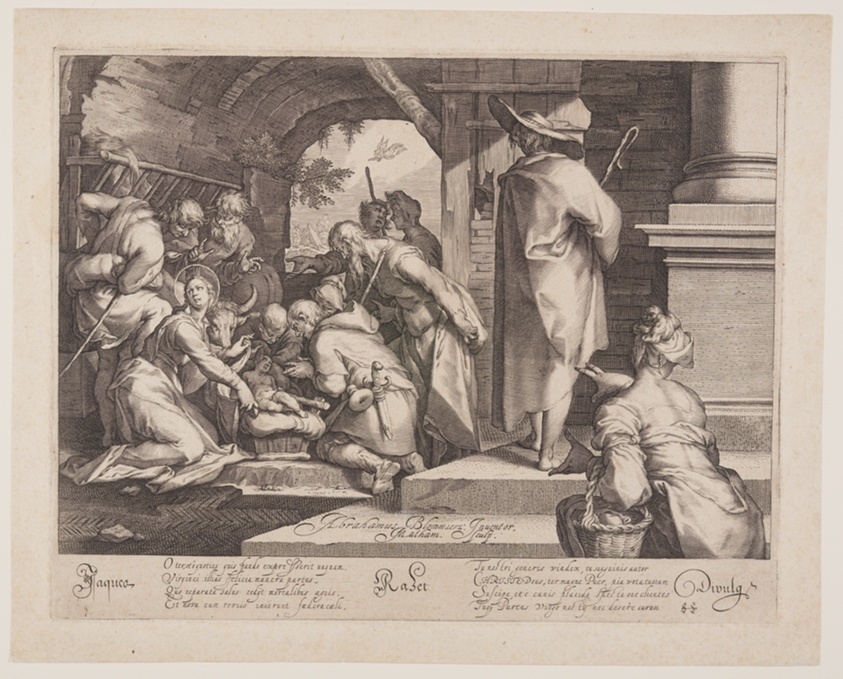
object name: Print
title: The Adoration of the Shepherds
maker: Jacob Matham (Dutch, 1571–1631); after Abraham Bloemaert (Dutch, 1566–1651)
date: c. 1597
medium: Engraving on ivory laid paper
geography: Netherlands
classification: print; paper; prints and drawing; engraving